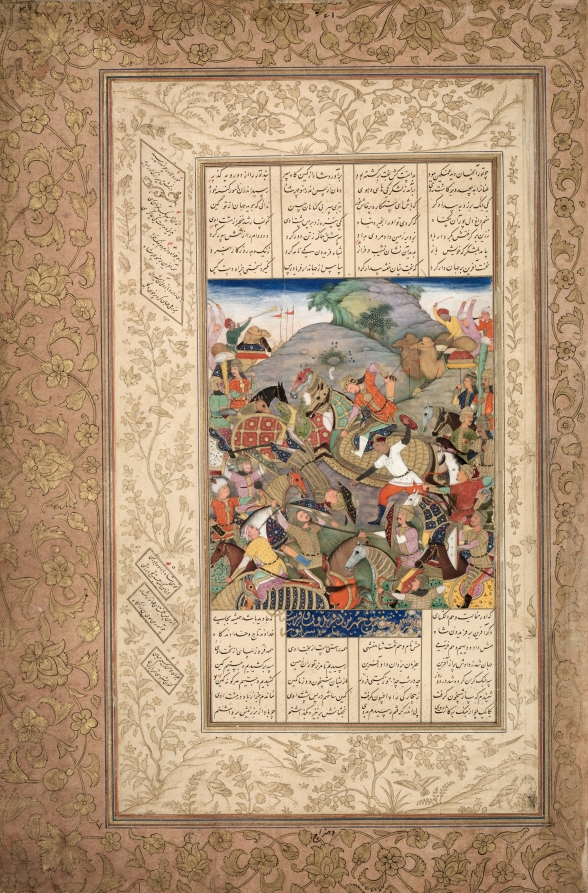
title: Battle between Manuchihr and Tur, from a Shah-nama (Book of Kings) of Firdausi (Persian, c. 934–1020)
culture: Mughal India, court of Jahangir (reigned 1605–27)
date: c. 1610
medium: Gum tempera, ink, and gold on paper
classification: Painting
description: This battle sets the stage for the ages-long enmity in the epic Shah-nama between the people of Iran and Turan—identified as Turkistan, the lands to the east of Iran. The conflict resulted from a bitter family feud that began when a warrior king divided his realm among his three sons; the older two were murderously jealous of the youngest, Iraj, to whom the best lands, those of Iran, were given. In this painting, the warrior in the center is Manuchihr, the grandson of Iraj, avenging his grandfather’s murder by slaying Tur, Iraj’s older brother to whom the less desirable lands of Turan were given. The confusion of battle is skillfully rendered through clustering warriors and warhorses together with varied postures, colors, and patterns.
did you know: Battles were waged to the sound of horns and the beat of drums on camels.